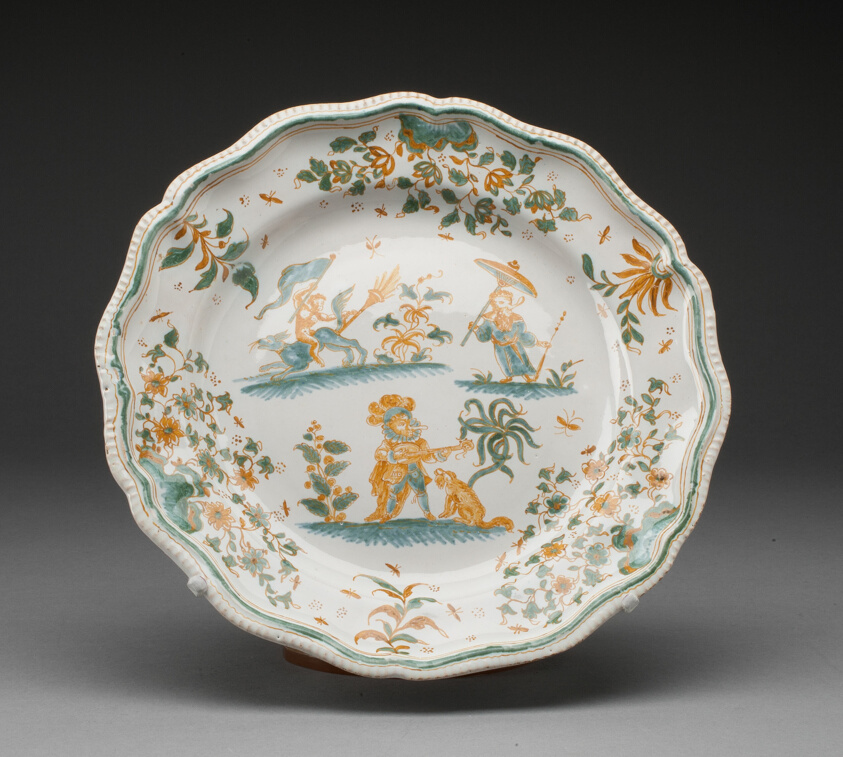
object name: Ceramics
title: Plate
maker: Olérys and Laugier Manufactory; French, founded in 17th century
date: c. 1740/50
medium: Tin-glazed earthenware (faience)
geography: Moustiers-Sainte Marie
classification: plate (general, dish); dish (vessel); tin-glazed ware; earthenware; european decorative arts; ceramics